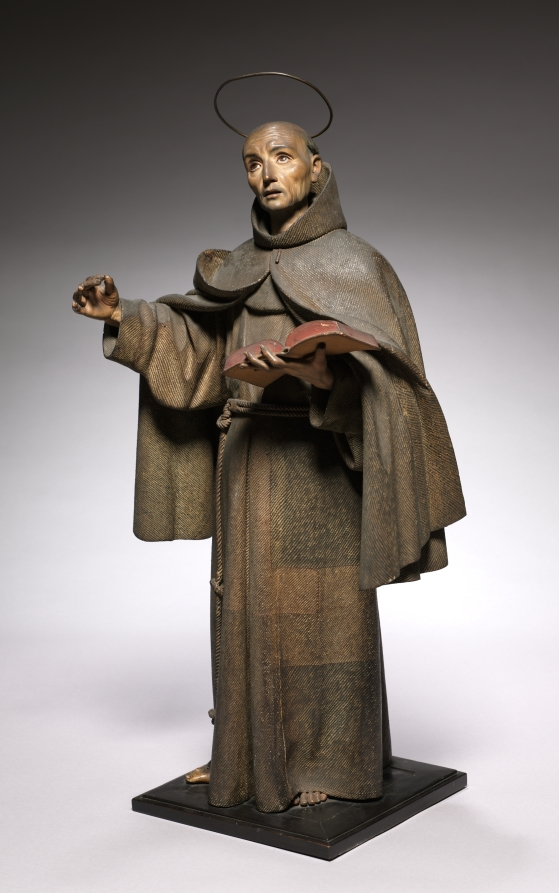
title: Saint Peter of Alcántara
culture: Spain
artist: Pedro de Mena (Spanish, 1628–1688)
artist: and Workshop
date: c. 1663–70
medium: painted wood, with ivory and glass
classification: Sculpture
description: Painted wood sculpture from Spain in the 1600s involved a team of artisans working under a lead sculptor. The sculptor first carved numerous pieces of wood in complex forms. So the paint would stick properly, these fragments were delicately covered in gesso (a combination of white chalk and glue made from animal collagen), preserving the subtle woodcarving underneath. The rough surface of the saint's face—reflecting his age and hardships—came from texturing the gesso with a brush. The glass eyes, probably imported from Venice, were inserted from behind the face before the wood pieces were attached. Finally, the eyelashes were added for a further touch of realism. A painter created the appearance of coarse sackcloth in a distinctive style, with yellow strokes rising off the surface. Smoother brushstrokes form the flesh tones, even revealing the saint's five-o'clock shadow. Unlike other kinds of painting, sculpture from southern Spain at this time was usually not covered in varnish; sculptors prized the unvarnished paint for its realistic effect, although it makes the surface exceptionally delicate and susceptible to dust and dirt, which more easily sticks to the surface.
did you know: Peter of Alcantara was so dedicated to his work he slept only 90 minutes a night--he's the patron saint of night watchmen!